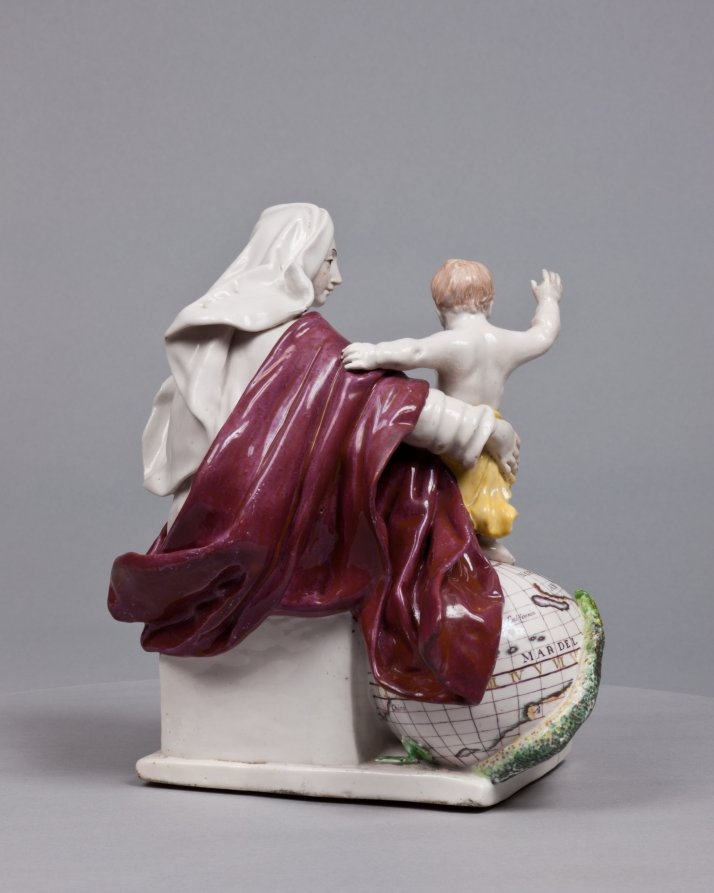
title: Madonna and Child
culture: England, Chelsea, 18th century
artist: Chelsea Porcelain Factory (Britain, London, 1745–84)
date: c. 1755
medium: porcelain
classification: Ceramic